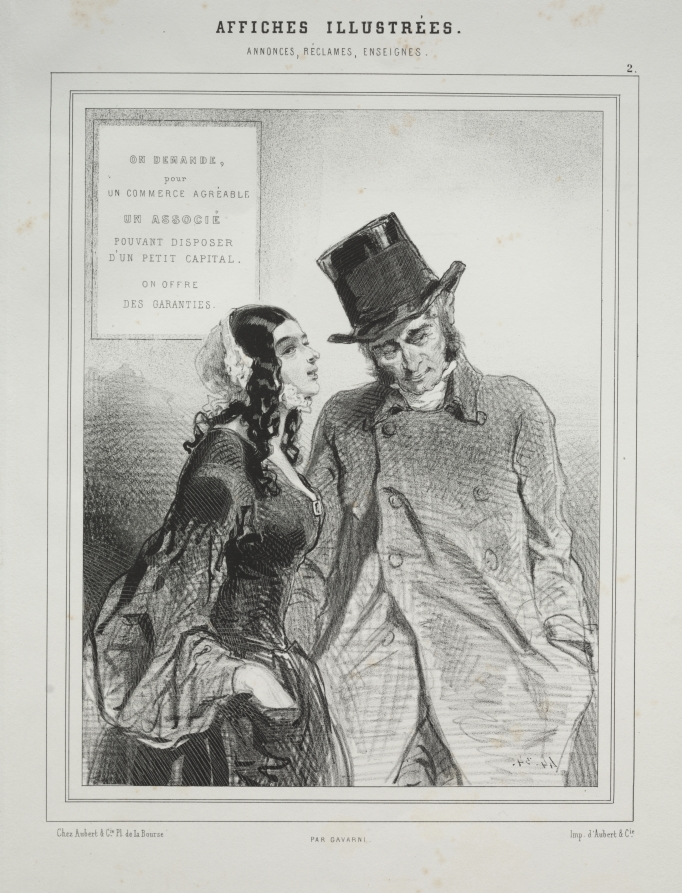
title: Affiches Illustrées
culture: France, 19th century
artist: Paul Gavarni (French, 1804–1866)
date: c. 1844–46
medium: lithograph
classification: Print